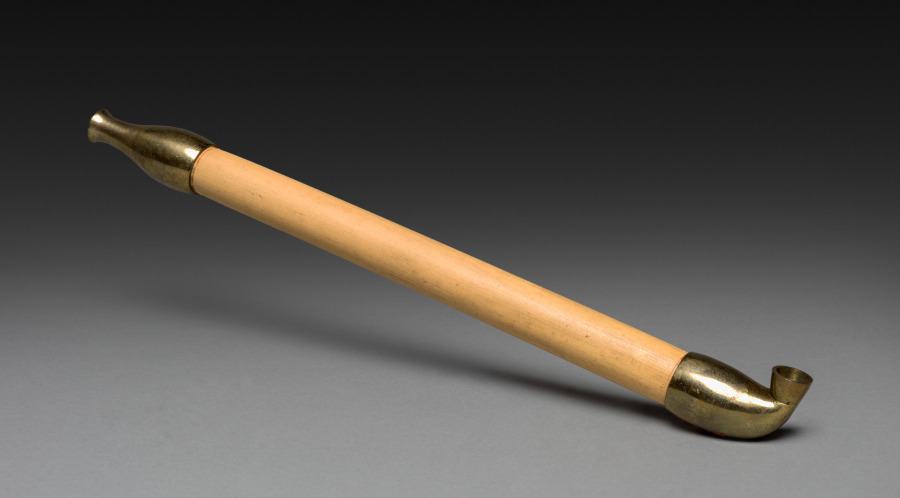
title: Tobacco Pipe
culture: Japan, Edo period (1615–1868) to Meiji period (1868–1912)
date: 1800s–early 1900s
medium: bamboo and brass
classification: Miscellaneous